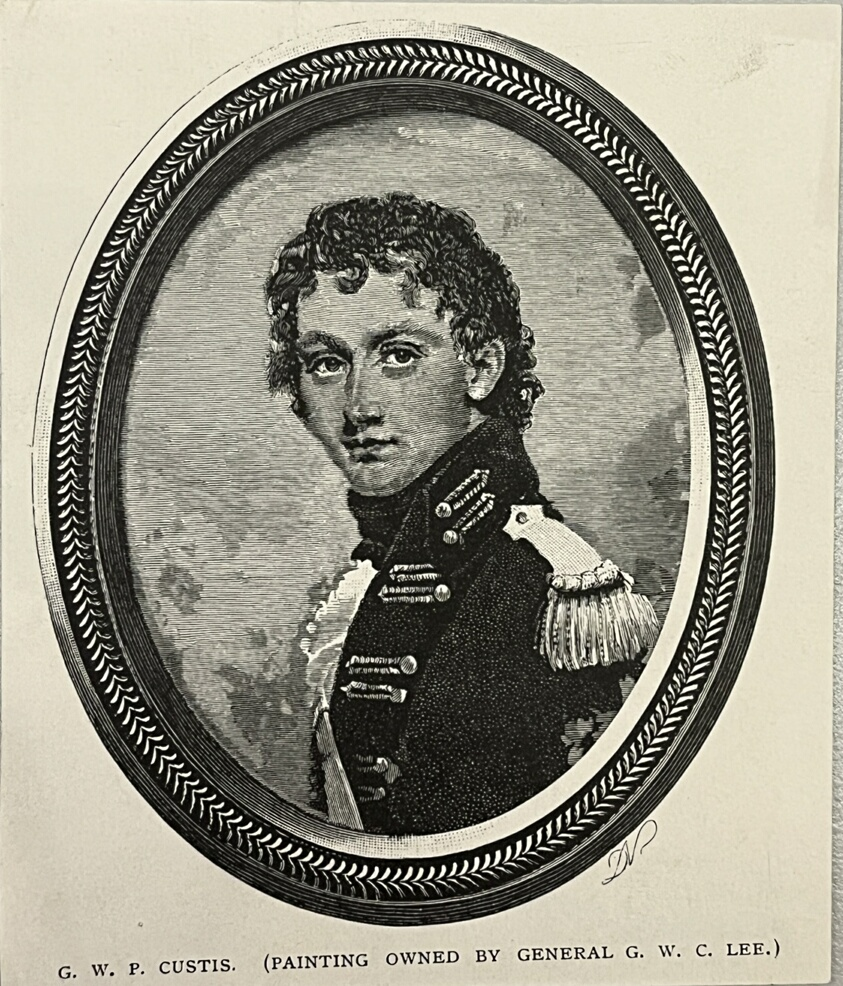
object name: Print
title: George Washington Park Custis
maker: Artist Unknown (Likely American or British, 19th century); after Robert Field (English, c. 1769-1819)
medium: Photolithograph on paper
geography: United States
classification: reproduction; print; prints and drawing